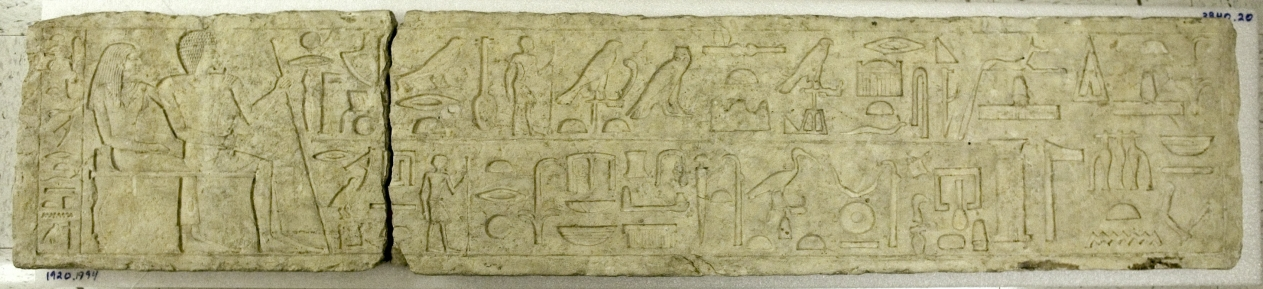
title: Lintel of Mereruka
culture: Egypt, Giza, western cemetery, excavations of Montague Ballard, 1901–2, Old Kingdom (2647–2124 BCE), Dynasty 5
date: c. 2350–2311 BCE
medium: limestone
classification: Sculpture